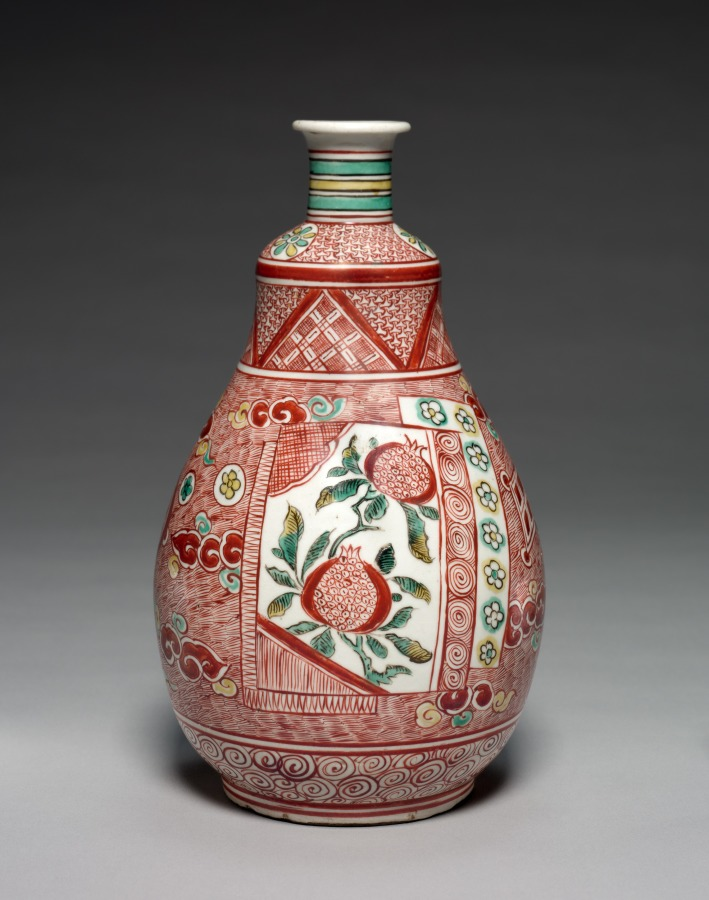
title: Tea Whisk-Shaped Sake Bottle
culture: Japan, Edo period (1615–1868)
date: 1660s–early 1670s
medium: Porcelain with overglaze enamel (Hizen ware, early iro-e)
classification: Ceramic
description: This sake bottle resembles a whisk used in preparing powdered green tea, with the handle at the top and the body of the brush flaring out below. Its bold design is anchored by images of chrysanthemums and pomegranates set in panels against a ground of red hatching with tricolored clouds. Additional patterns of swirls, stripes, flowers, and other forms make the piece dazzling.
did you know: This bottle is for sake, or fermented rice wine, Japan's most famous variety of local alcohol.